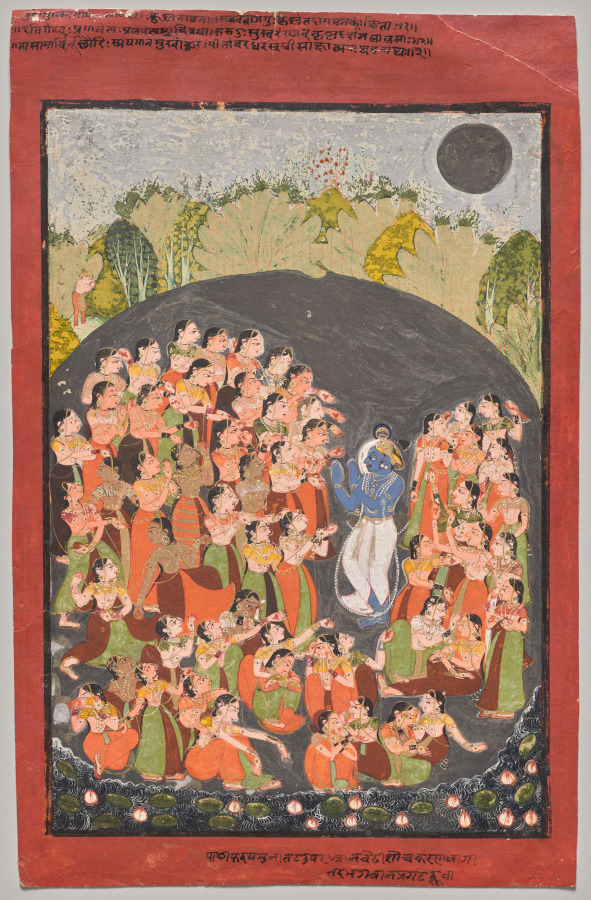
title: Krishna and the Gopis Gather for Rasamandala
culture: Northwestern India, Rajasthan, Rajput Kingdom of Kota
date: c. 1720–30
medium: Gum tempera, ink, and gold on paper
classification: Painting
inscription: Inscription at top in Sanskrit (damaged): "Moved by the coming of the Lord, the gopis went up to him and were overcome by the sight of Krishna, who was shining with moonlike splendor; then the Lord, who was a (love) thief, wearing yellow garments, smiled slightly with his lotuslike mouth. Radha said to her sakhi, 'He is certainly the God of Love.'" At the bottom in Hindi: "On the banks of the Jumna, the gopis are expressing their grief and sorrow as Krishna tells them he is leaving them."1 (Translation by J. Losty; although the Sanskrit verse is clearly from a Krishna text like the Gita Govinda, the source has not been identified.)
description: On the banks of a river full of lotus flowers, the blue god Krishna address the gopis, women of the cowherding community where he spent his youth. At first, they approach him, smiling and delighted, proclaiming that he is the god of love, shining like the full moon above. When he tells them that he is soon leaving them, they fall to the ground, distraught. Although the figures of the gopis are painted individually, with varied skin colors and garments, they act collectively.